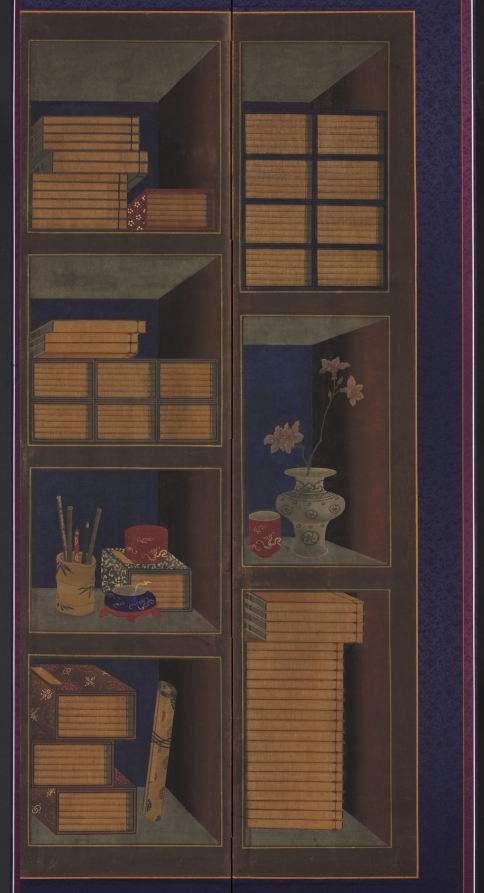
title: Books and Scholars’ Accoutrements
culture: Korea, Joseon dynasty (1392–1910)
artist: Yi Taek-gyun (Korean, 1808–after 1883)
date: late 1800s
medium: ten-panel folding screen; ink and color on silk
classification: Painting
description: First produced around the second half of the eighteenth century, chaekgado (literally, “pictures of bookshelves”) flourished throughout the 1800s as a royal emblem. And soon this pictorial genre became a popular furnishing item for aristocrats' elegant studies. The third panel from the right bears a hidden seal that reveals the artist: Yi Taek-gyun, a prominent court artist active in the late 1800s.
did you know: A convincing hypothesis that connects the Korean chaekgado tradition with the Renaissance tradition of illusionistic studiolo through the technique of trompe-l'œil and Chinese Qing period treasured cabinet paintings was first made in Park Shim-eun's thesis (2002).